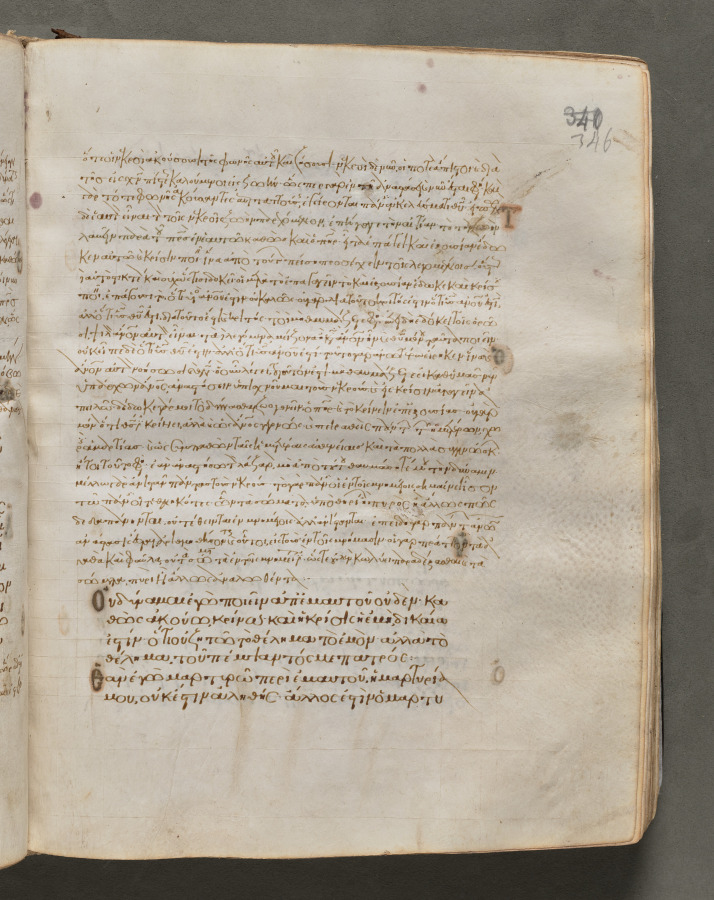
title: Text, folio 346 (recto), from a Gospel Book with Commentaries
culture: Byzantium, Constantinople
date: c. 1000–1100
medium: ink, tempera, and gold on vellum; leather binding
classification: Bound Volume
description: Each of the four gospels in this book opens on a page with brilliantly illuminated borders depicting the author of the text as well as birds—principally peacocks, symbols of the immortality of the soul—and fountains, representing the fountain of life and the salvation of the soul. This volume consists of 428 leaves with texts in Greek. Its level of sophistication suggests that it was probably written and decorated in a monastery in Constantinople.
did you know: Gospel books were carried in procession through Byzantine churches.